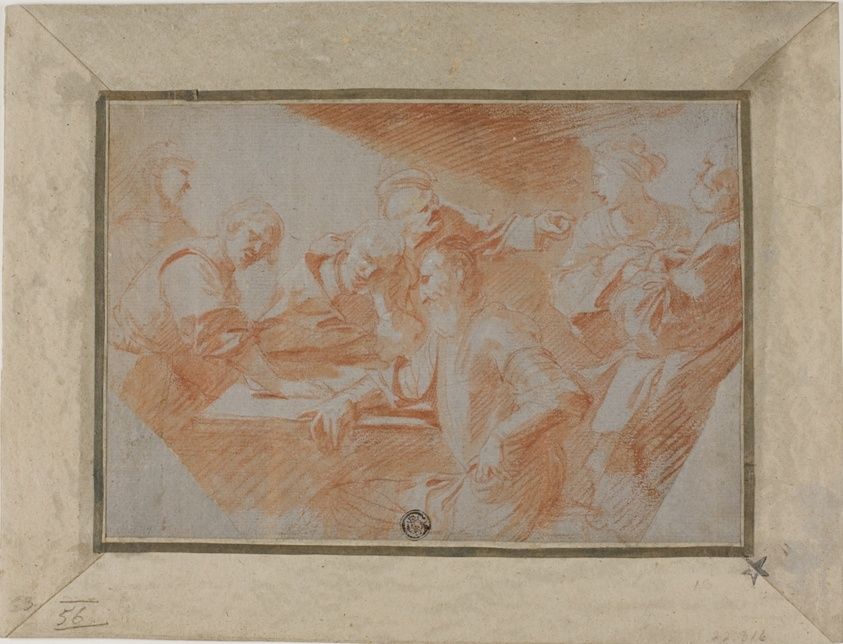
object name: Drawing and Watercolor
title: Group of Figures Around Table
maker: Attributed to Sébastien Bourdon; French, 1616-1671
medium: Red chalk and brush and red chalk wash, with touches of pen and metallic gold paint, heightened with touches of white chalk, on cream laid paper prepared with a gray gouache ground, laid down on cream laid card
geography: France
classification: chalk; drawings (visual works); prints and drawing